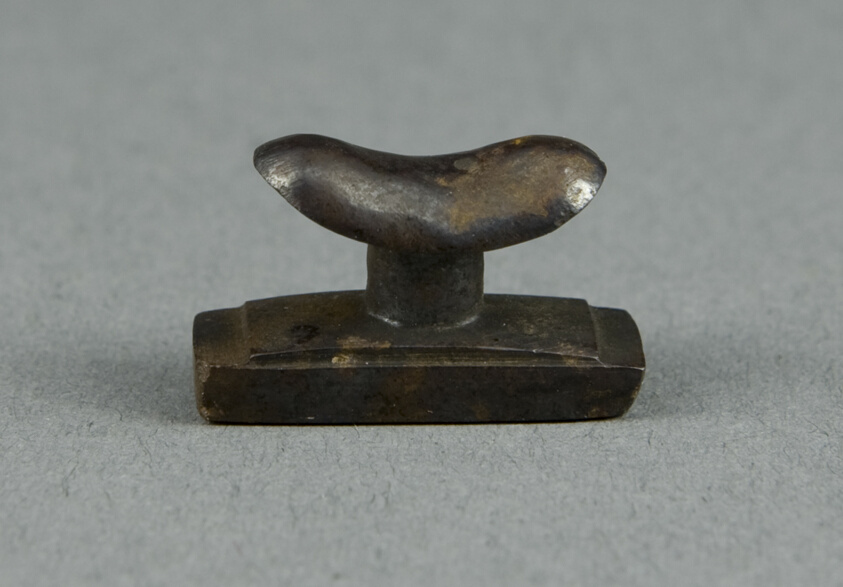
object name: Costume and Accessories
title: Amulet of a Headrest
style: late period (egyptian), egyptian, ancient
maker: Egyptian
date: Late Period, Dynasties 26–31 (664–332 BCE)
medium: Hematite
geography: Egypt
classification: amulet; jewelry; stone; ancient art; costume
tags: Headrest